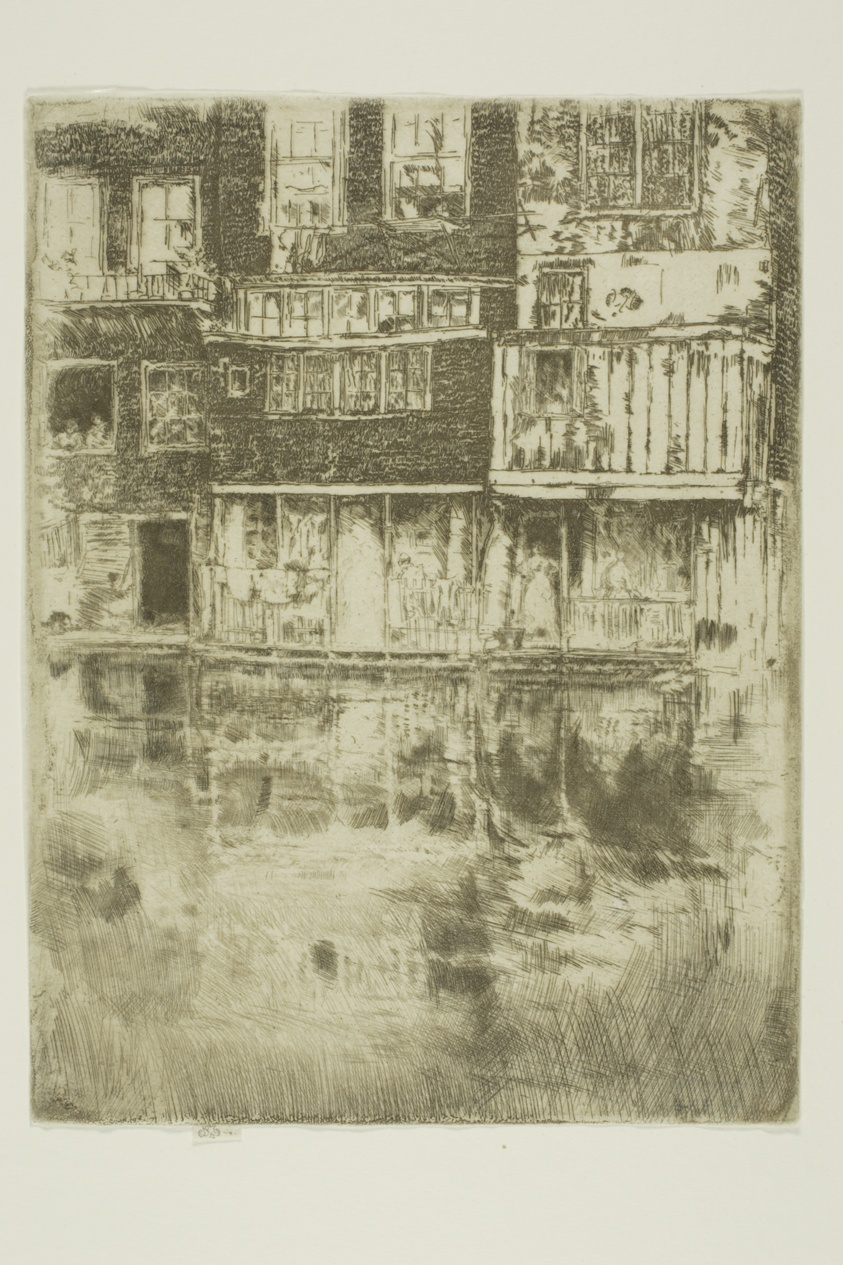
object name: Print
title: The Square House, Amsterdam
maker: James McNeill Whistler (American, 1834-1903)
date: 1889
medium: Etching with foul biting in black ink on ivory Japanese paper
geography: United States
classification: etching; foul biting; print; prints and drawing; paper